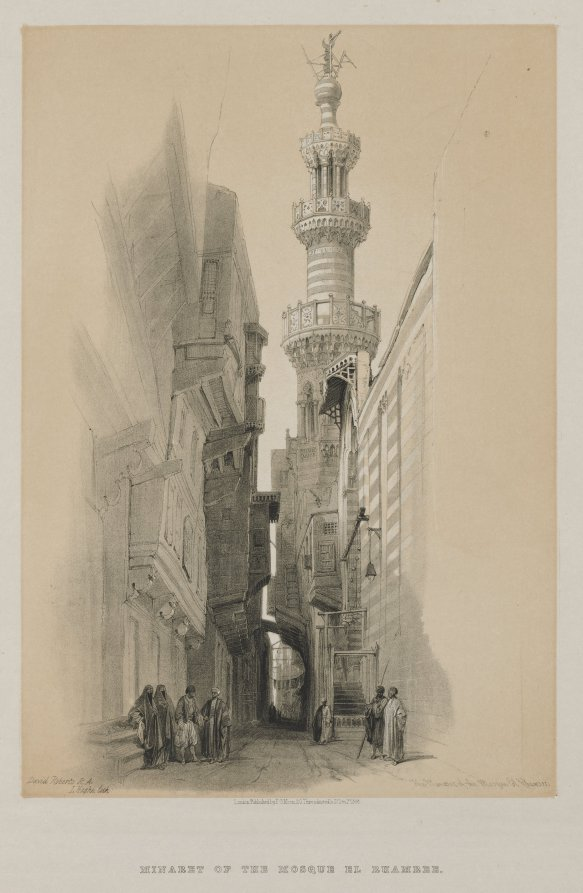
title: Egypt and Nubia, Volume III: The Minaret of the Mosque El Rhamree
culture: England, 19th century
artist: Louis Haghe (British, 1806–1885)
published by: F. G. Moon (British, 1797–1871)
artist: after David Roberts (Scottish, 1796–1864)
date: 1848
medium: color lithograph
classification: Print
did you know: The minaret is the tower from which the call to prayer, adhan, is recited.